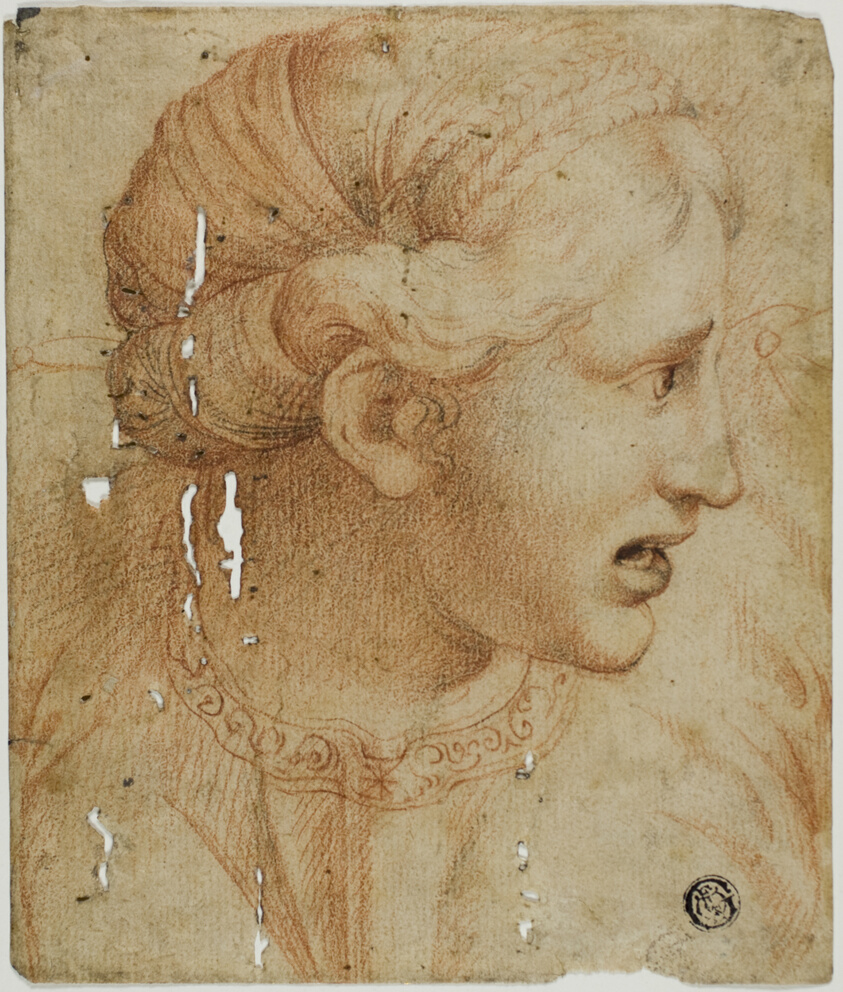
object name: Drawing and Watercolor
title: Female Head in Profile, Facing Right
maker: After Workshop of Raffaello Sanzio, called Raphael; Italian, 1483-1520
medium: Black and red chalk on ivory laid paper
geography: Italy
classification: chalk; drawings (visual works); prints and drawing